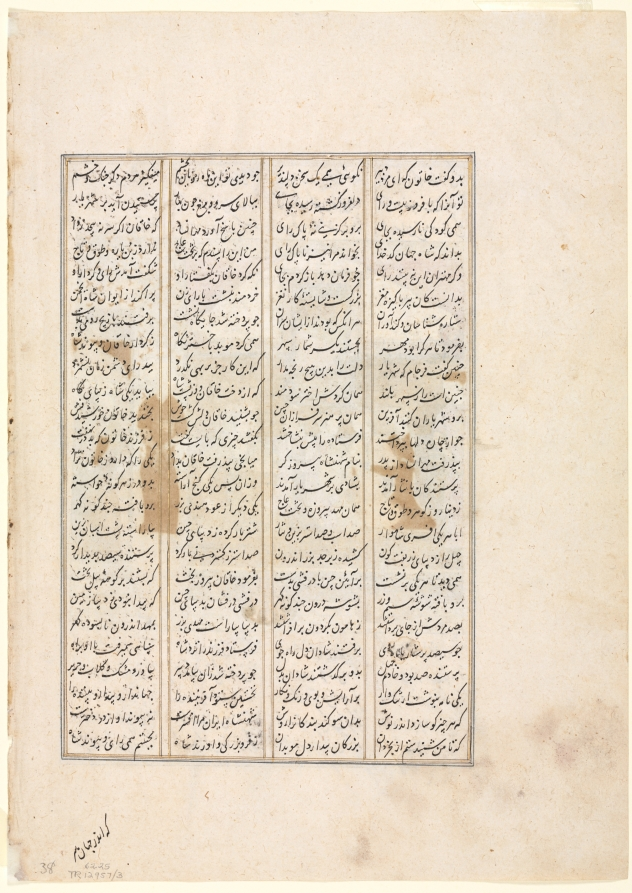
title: The Forty-Eighth Year of Nushirwan's Reign: the Combat of the Khaqan of China with the Haithalians (verso) from a Shahnama (Book of Kings) of Firdausi (940–1019 or 1025)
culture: Iran, Shiraz, Timurid period (1370-1501)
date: c. 1482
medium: opaque watercolor, ink, and gold on paper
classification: Manuscript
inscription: Script: Nasta'liq